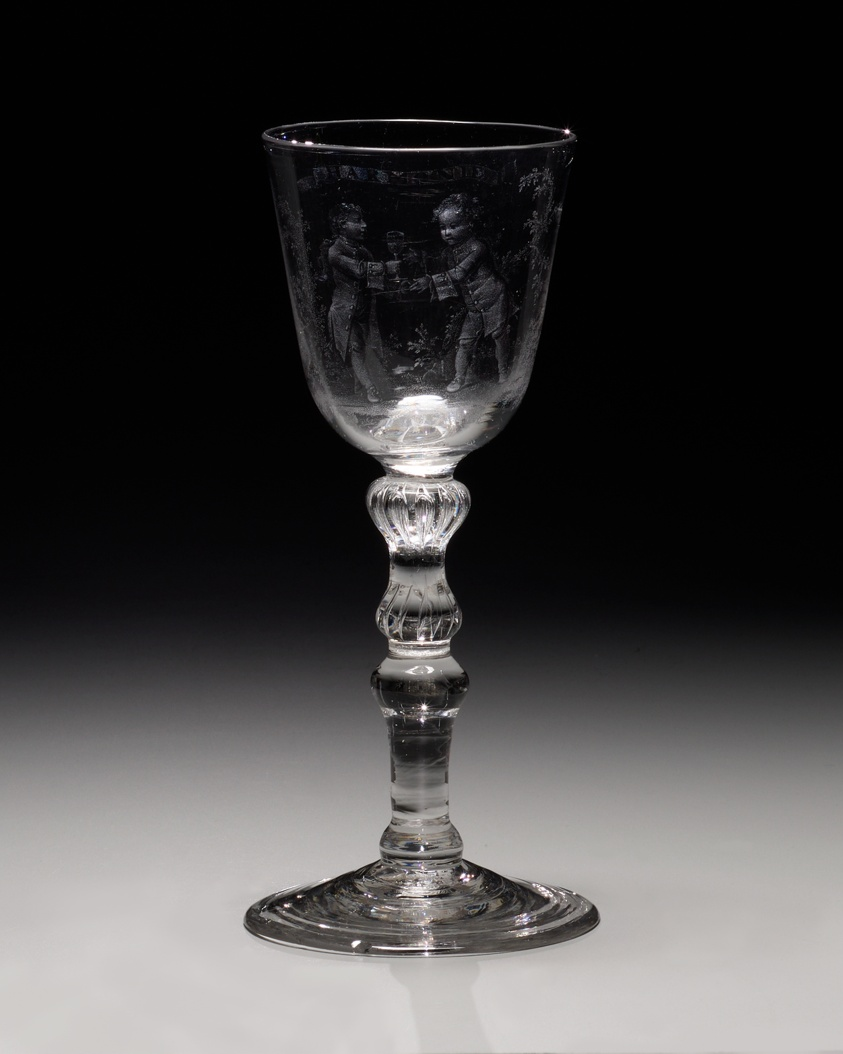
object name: Glass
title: Wine Glass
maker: England or Netherlands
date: c. 1770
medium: Glass; blown and stipple engraved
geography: England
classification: drinking vessel; glass; european decorative arts